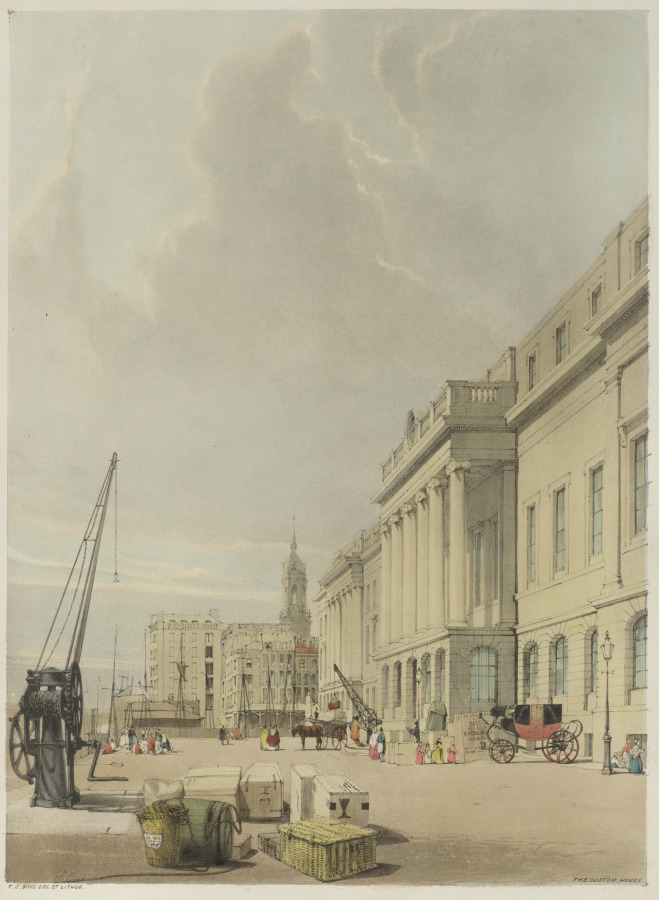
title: London As It Is: Doorway, The Custom House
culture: England, 19th century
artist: Thomas Shotter Boys (British, 1803–1874)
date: 1842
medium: lithograph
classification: Bound Volume